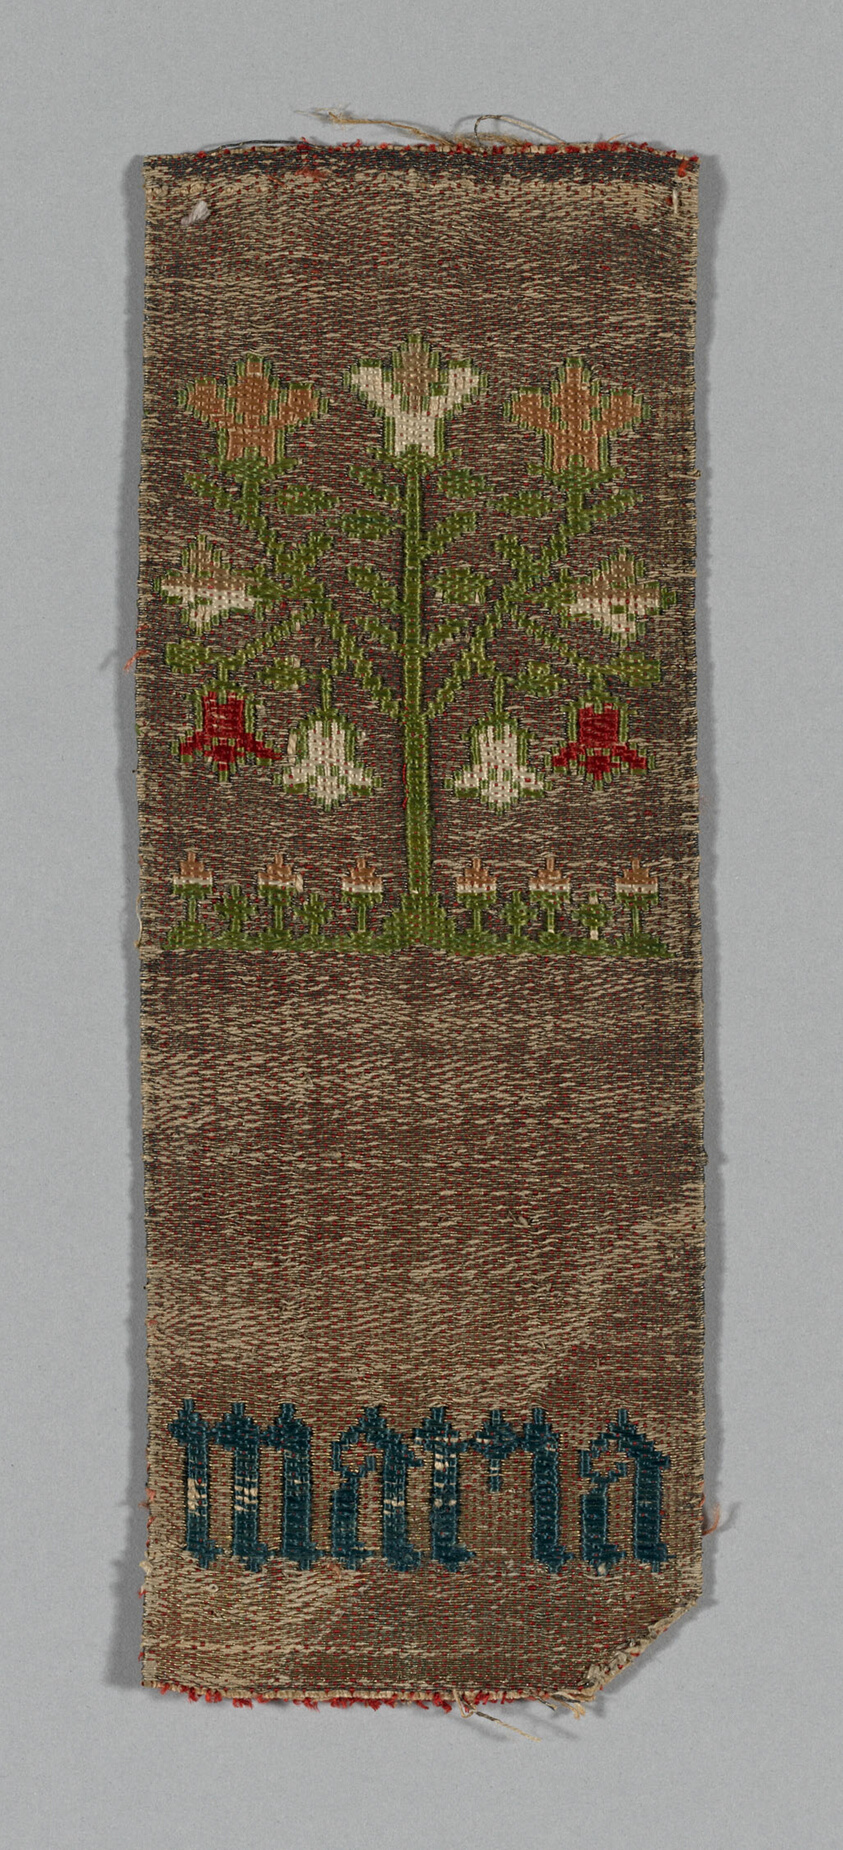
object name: Textile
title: Fragment (From an Orphrey Band)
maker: Germany, Cologne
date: 15th century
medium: Silk, linen, and gilt-animal-substrate-wrapped linen, bands of four color complementary weft, weft-float-faced 1:2 'S' twill weave with inner wefts and of two color complementary weft, weft-float faced 1:2 weft chevron twill weave with inner warps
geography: Cologne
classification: textile; weaving; liturgical